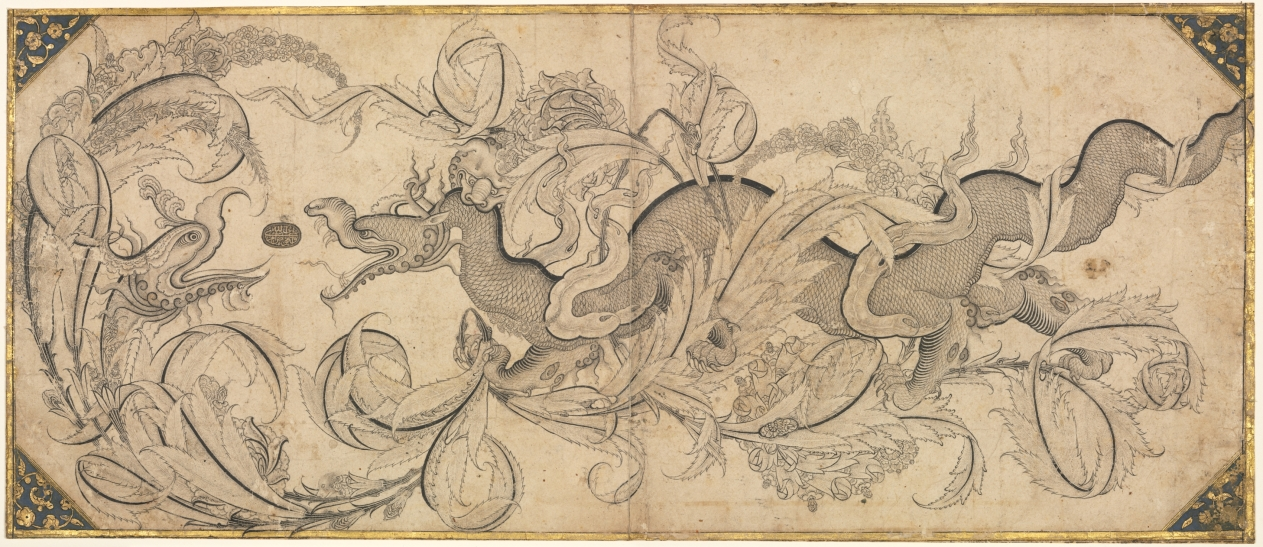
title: Dragon in foliage with lion and phoenix heads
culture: Ottoman Turkey, Istanbul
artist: attributed to Sahkulu (Turkish, active 1526–56)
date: mid-1500s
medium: Ink, gum tempera, and gold on paper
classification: Drawing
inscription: [stamp between dragon and phoenix, in Naskh script] And I commit my case unto God. [Qur’an 40:44]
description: A dragon lunges toward a pearl in the form of a seal inscribed with a verse from the Koran: “And I commit my case unto God” (40:44). In his front claw, the dragon grasps two flowering branches that magically produce a variety of blooms, including a lion that bites the dragon’s neck and a phoenix, who competes for the pearl. Sahkulu was trained by Persian artists, as were many artists of Mughal India during the 1500s. He joined the Ottoman imperial painting atelier in Istanbul in 1526 and became the head in 1545.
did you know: The lion head and phoenix head are part of the foliage, like fantastical blossoms.